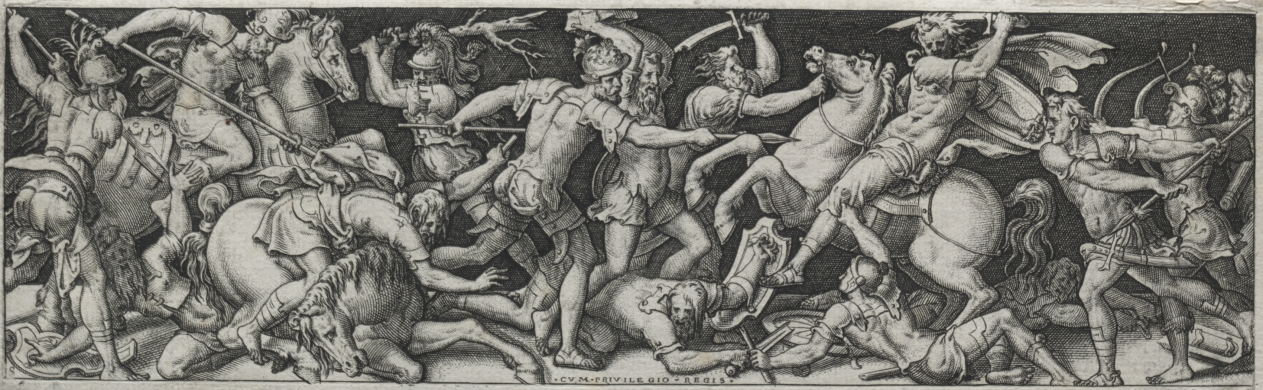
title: Combats and Triumphs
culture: France, 16th century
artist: Etienne Delaune (French, 1518/19-c. 1583)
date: probably 1560s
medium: engraving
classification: Print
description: Etienne Delaune (French, 1518/19-1583) Combats and Triumphs, probably 1560s Engravings Gift of Leonard C. Hanna 1924.671-.674 The Triumph of Bacchus Battle of Men and Animals Combat of the Naked Men Battle of the Centaurs and the Lapiths The four prints shown here come from a series of twelve known as the Combats and Triumphs. The friezelike composition reflects the artist's study of marble relief carvings on Greek and Roman sarcophagi (coffins), here reduced to a preciously small setting. Against a flat, stagelike background, Delaune's balletic warriors engage in a Mannerist version of artificial war. Etienne Delaune was inspired by the art created at Fontainebleau, but he worked in Paris and then Strasbourg during the late 1500s. His small, exquisitely executed engravings reflect his training as a goldsmith and his work as a medallist.